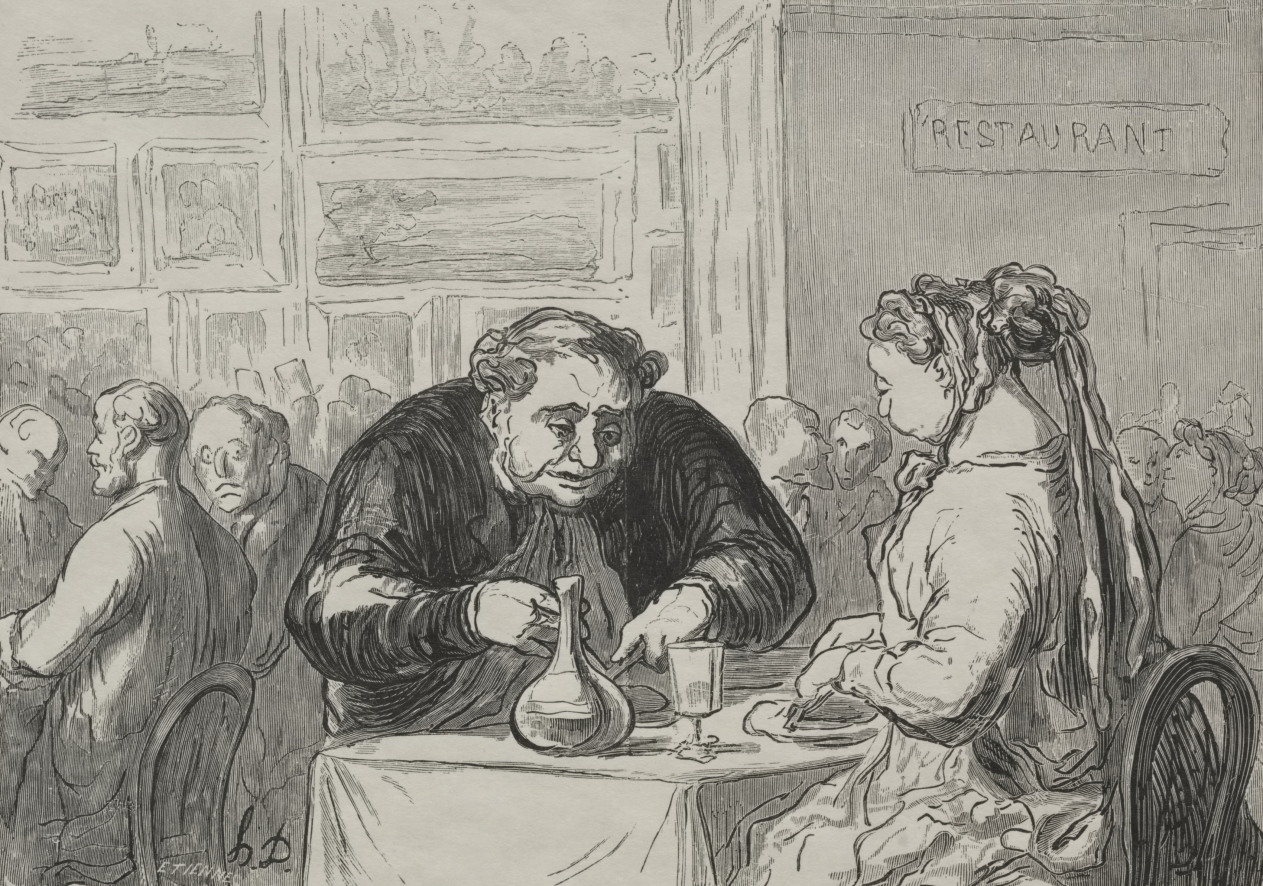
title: The Restaurant of the Great Art Exhibition: Love for the arts and the cutlet.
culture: France, 19th century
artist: Honoré Daumier (French, 1808–1879)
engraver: Étienne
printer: François Louis Schmied (Swiss, 1873–1941)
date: 1868, printed 1920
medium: wood engraving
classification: Print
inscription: Lower margin, in pencil: 40/75 ; red stamp: FLS